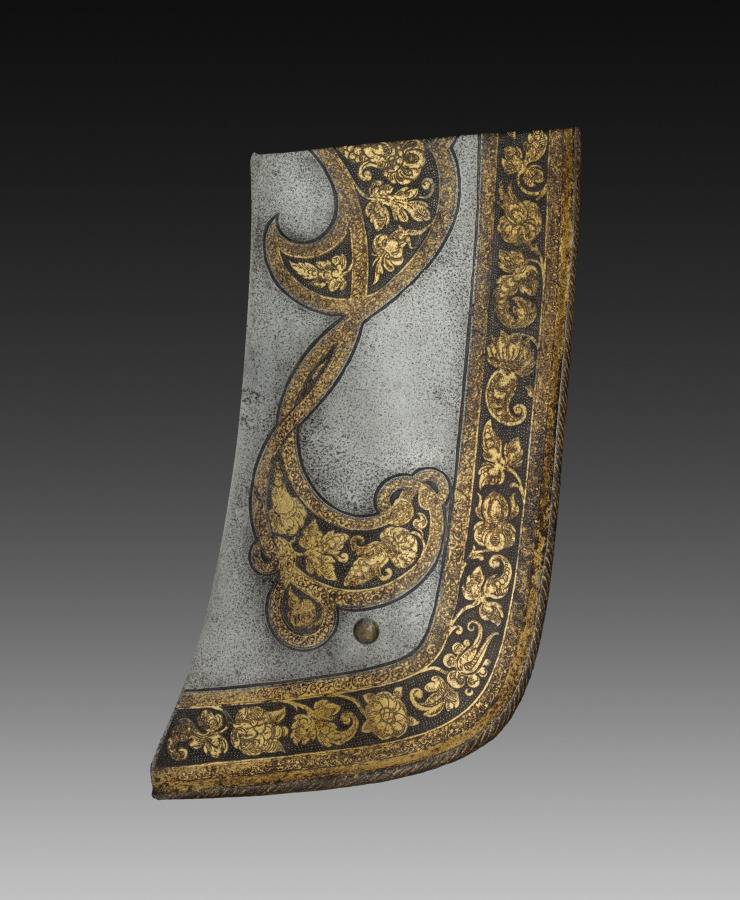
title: Pommel Plate of a Saddle (from the Garniture of Rudolf II)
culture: Germany, Augsburg, 16th century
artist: Anton Peffenhauser (German, 1525–1603)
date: c. 1571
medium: blued, etched, and gilded steel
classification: Arms and Armor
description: This plate, one of two and once part of a saddle, is from tournament armor made for man and horse made for the sons of Emperor Maximilian II, archdukes Rudolf and Ernst. Most of the remaining elements of this armor are still in the collections of the Imperial Armouries in Vienna. The decorative pattern (in the imperial colors of black and gold) forms elegant knots, with distinctive foliage and hop sprigs filling the loops.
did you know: Once part of a saddle, this plate protected the rider's thigh.